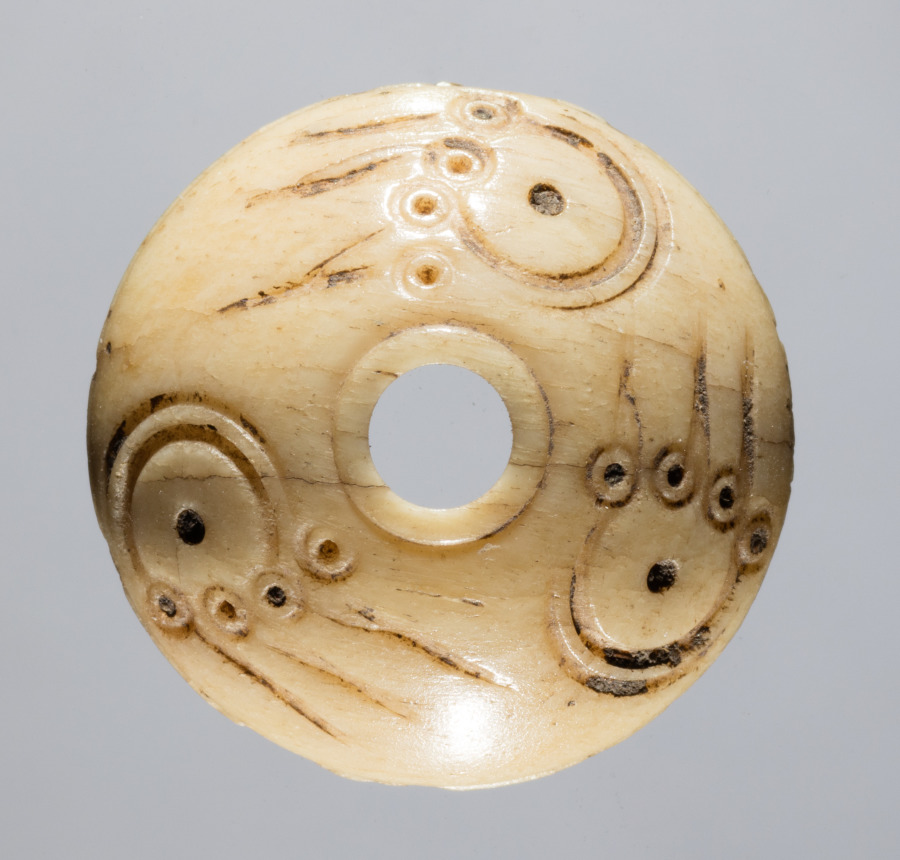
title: Spindle Whorl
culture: Iran, early Islamic period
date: 700s - 900s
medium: bone, incised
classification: Spindle Whorl